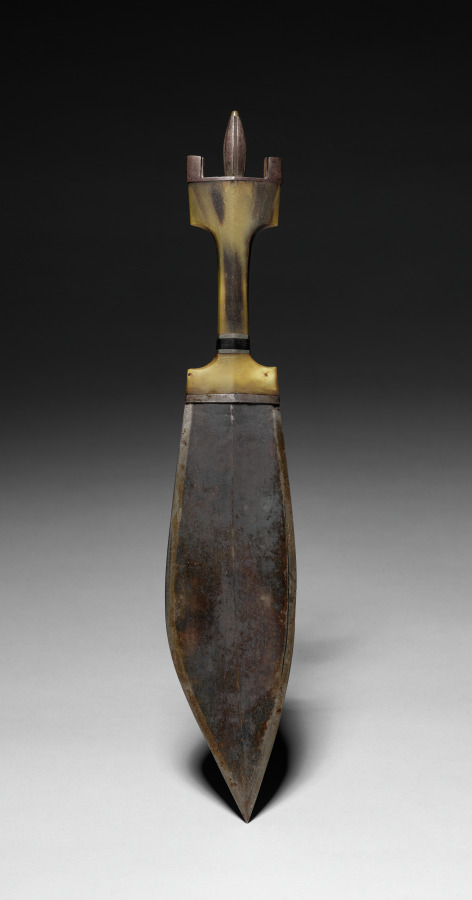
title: Knife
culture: Africa, unknown maker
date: 1800s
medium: steel with horn handle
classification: Arms and Armor